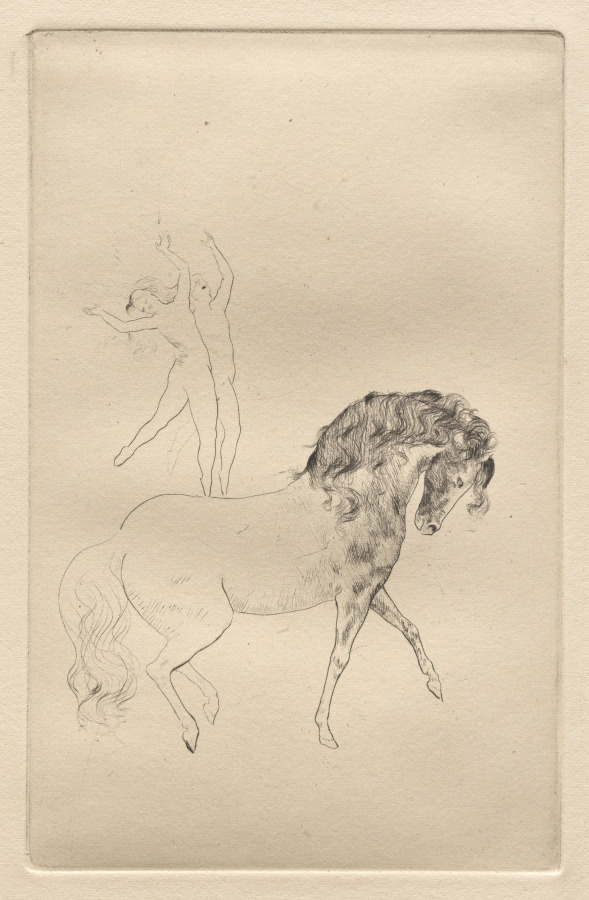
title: At the Circus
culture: Spain, 20th century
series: The Saltimbanques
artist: Pablo Picasso (Spanish, 1881–1973)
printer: Louis Fort (French, active 1800s–1900s)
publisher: Ambroise Vollard (French, 1867–1939)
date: winter 1905–6, printed 1913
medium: drypoint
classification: Print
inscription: Watermark: [VAN GELD]ER ZONEN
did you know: Picasso frequently attended the Cirque Medrano in the Montmartre neighborhood of Paris where he lived at the time.